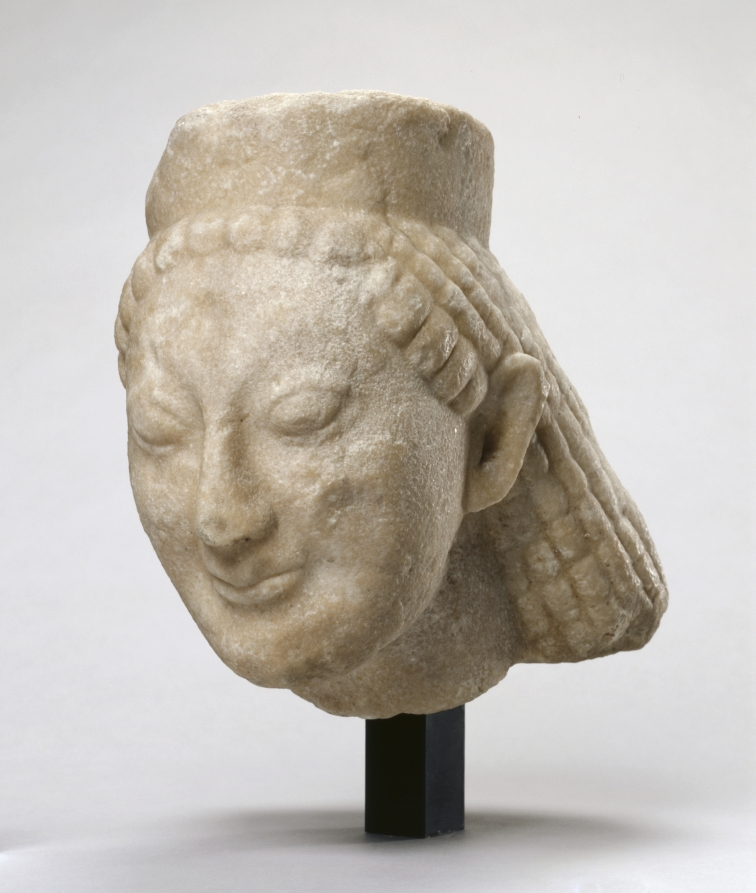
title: Head of a Sphinx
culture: Greece, Archaic period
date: 540–520 BCE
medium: marble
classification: Sculpture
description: This female head once belonged to a sphinx, a mythological hybrid creature with the head of a woman and body of a winged lion. Her short cylindrical crown, known as a polos, helps to identify her as a sphinx, as does the slope of her hair and neck, which once continued onto a feline body. Also common in ancient Egyptian and Near Eastern art (though more often in male form), the sphinx is best known in Greek mythology for devouring passersby who could not answer her riddle outside the Boiotian city of Thebes. Stone sphinxes like this one served as both votive offerings and grave monuments in Archaic Greece.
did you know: Greek sphinxes were often placed on top of columns or grave stelai as guardian figures.